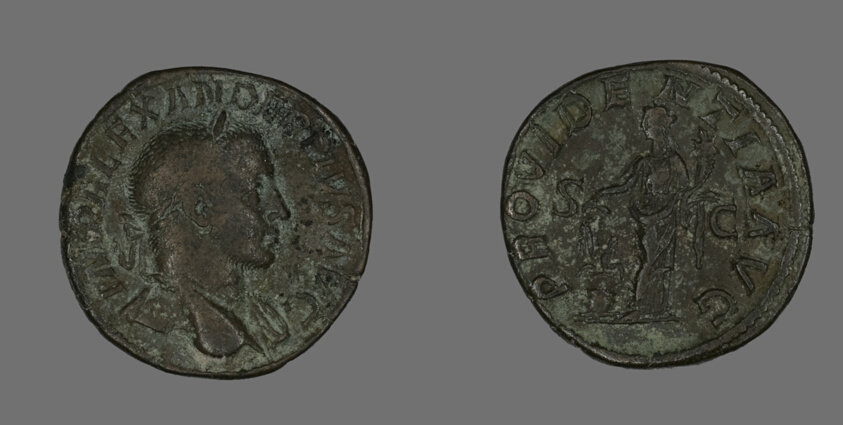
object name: Coin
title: Sestertius (Coin) Portraying Emperor Severus Alexander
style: roman (ancient, style or period)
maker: Roman, minted in Rome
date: 232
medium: Bronze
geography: Roman Empire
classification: coin; ancient art